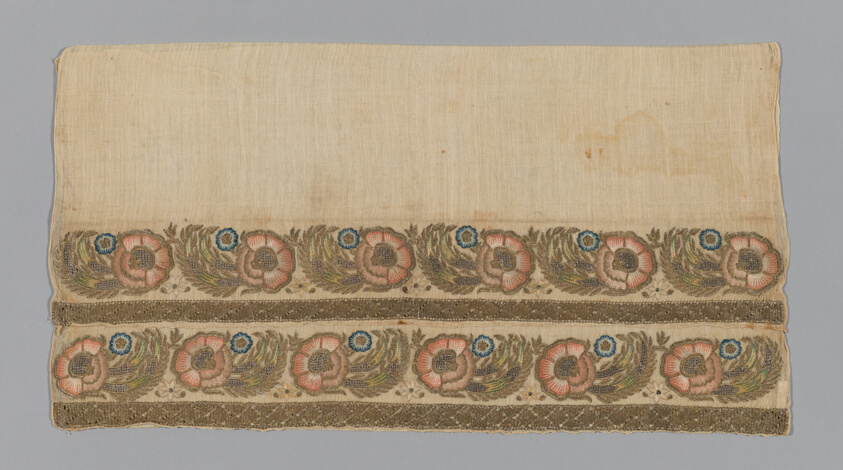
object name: Textile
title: Towel or Napkin (Altered)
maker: Turkey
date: 19th century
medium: Embroidered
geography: Turkey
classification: textile; needlework (visual works); weaving